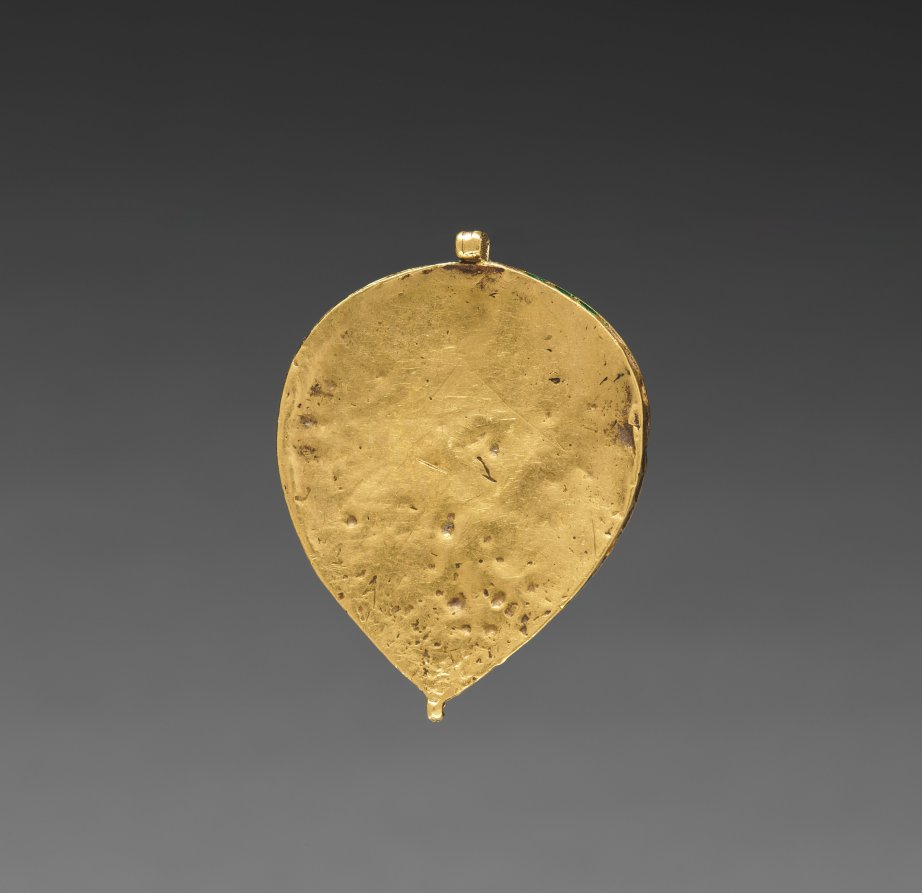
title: Pendant: Krishna as Shri Nathji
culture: Northwestern India, Rajasthan, Nathdwara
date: c. 1800–1830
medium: champlevé enamel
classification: Jewelry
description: Diminutive images of Krishna as Shri Nathji were worn by devotees, sometimes secretly in times of persecution. Even in the tiny composition, Krishna’s raised left hand can be seen clearly, referencing his miraculous lifting of Mount Govardhan. In his right arm he holds his herdsman’s staff. Two priests offer lamps in his honor.